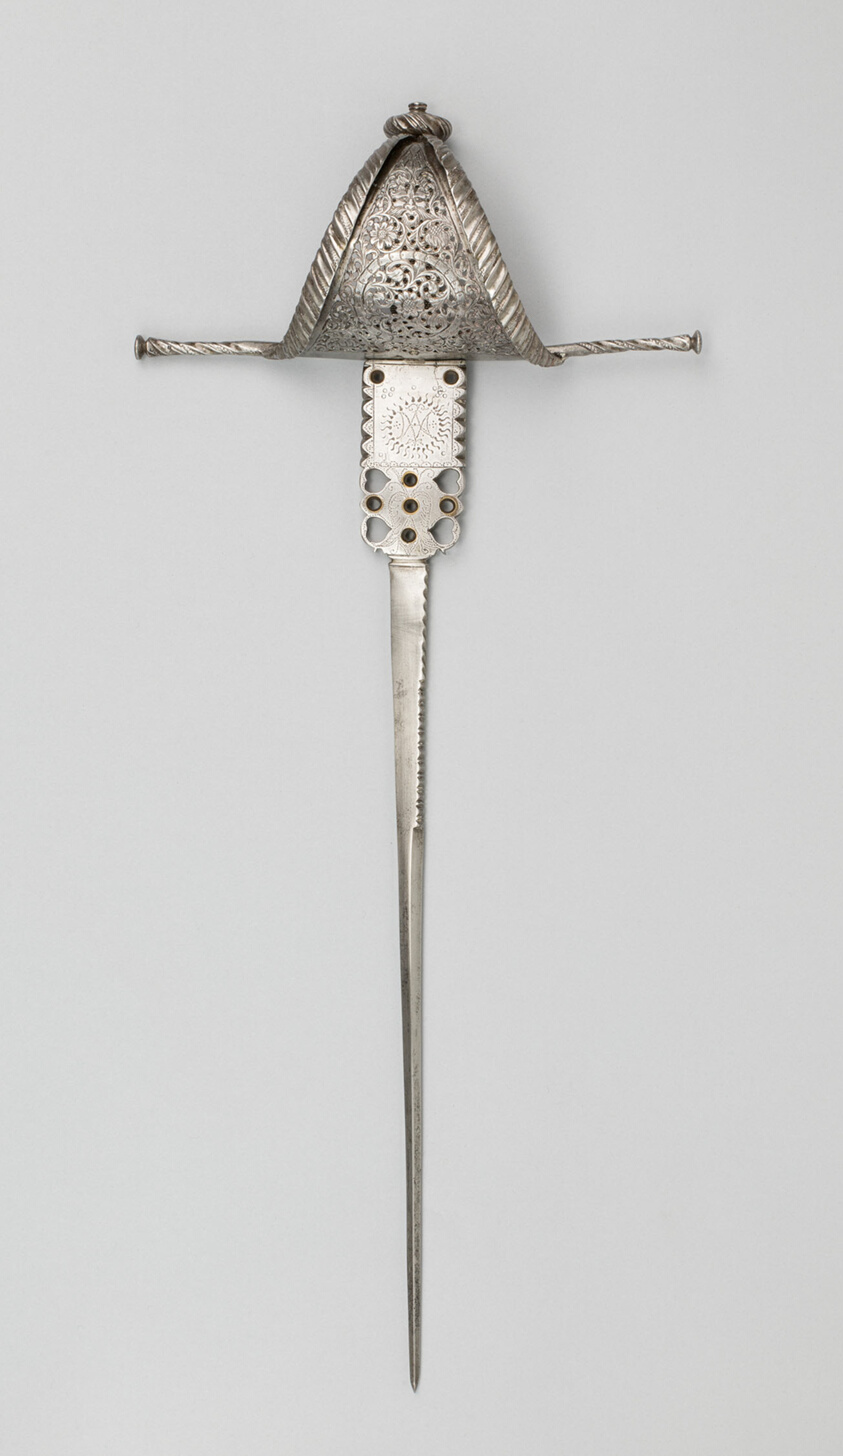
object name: Arms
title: Parrying Dagger for Pietro Antonio Martinengo, Count of Brescia (recorded 1644-1671)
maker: Italian, perhaps Brescia; Blade: probably Spanish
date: 1650/75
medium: Iron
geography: Italy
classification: edged weapon-dagger; arms; arms and armor